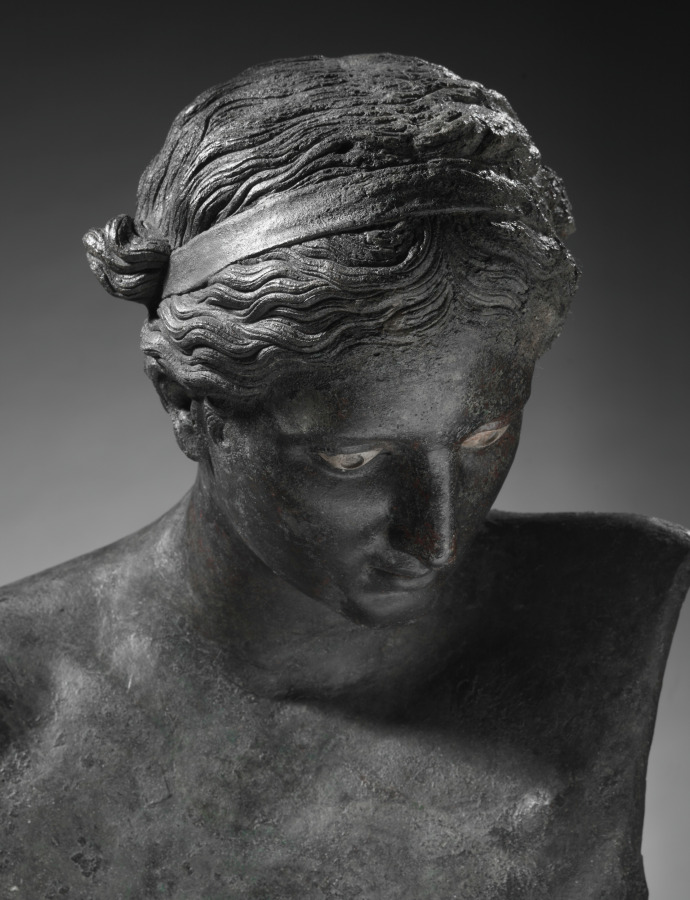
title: The Cleveland Apollo: Apollo Sauroktonos (Lizard-Slayer) or Apollo the Python-Slayer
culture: Greece, Athens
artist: attributed to Praxiteles (Greek, Athenian, c. 400–330 BCE)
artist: or Follower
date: c. 350–200 BCE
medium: bronze, copper and stone inlay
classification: Sculpture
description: The Cleveland Apollo was cast in multiple sections using the indirect lost-wax technique. First, molds were taken from a working model (now no longer known or preserved), which was then reproduced in hollow wax sections, each filled with a clay core. After details were added to the wax models, each was encased in clay. Then, the wax was heated, melted out, and replaced by molten bronze. Once cooled, the hollow bronze sections were fused together and finished, patching flaws and adding inlays and other details. Since the initial model was retained, it could be reused, allowing ancient sculptors to create multiples and variations of favorite works. Thus, remarkably, the Cleveland Apollo may once have been one of several such works. The consistently thin walls of the Cleveland Apollo (mostly 5-6 mm thick), together with the nearly invisible joins between most cast sections, show that it was created by highly skilled sculptors and foundry workers. Close looking reveals several noteworthy features. First, ovals atop the right foot mark a fusion weld, where molten bronze pooled to join separately cast sections. Second, small rectangular bronze patches cover parts of the surface (especially the right hip), each carefully cut and then hammered into place over holes or other casting defects. Inlaid lips, nipples, and eyes (the right ancient stone, the left now a modern replacement) added to the lifelike appearance of the sculpture, contrasting with the once bronze-colored skin. Finally, radiography helps to illuminate hidden features, such as the cast edge of the neck of Apollo.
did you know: Ovals across the top of the right foot show a clear join between separately cast sections.